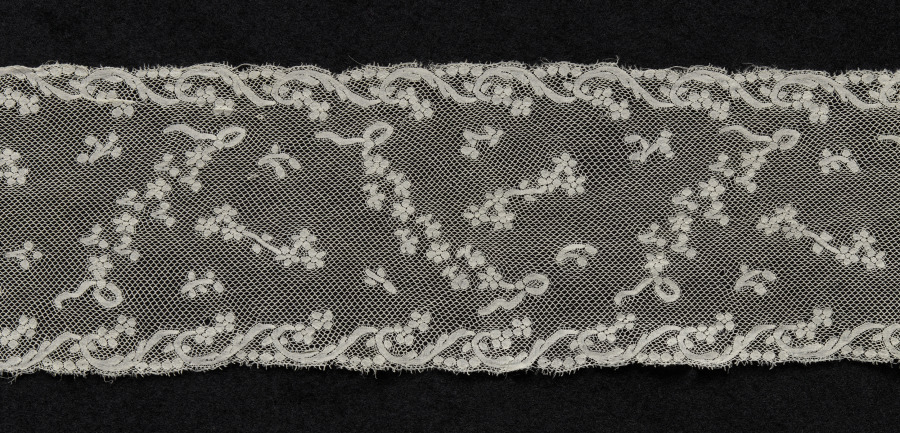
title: Lace Lappet (in two parts)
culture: France, Valenciennes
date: 1780s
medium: Bobbin lace (Valenciennes)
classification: Lace